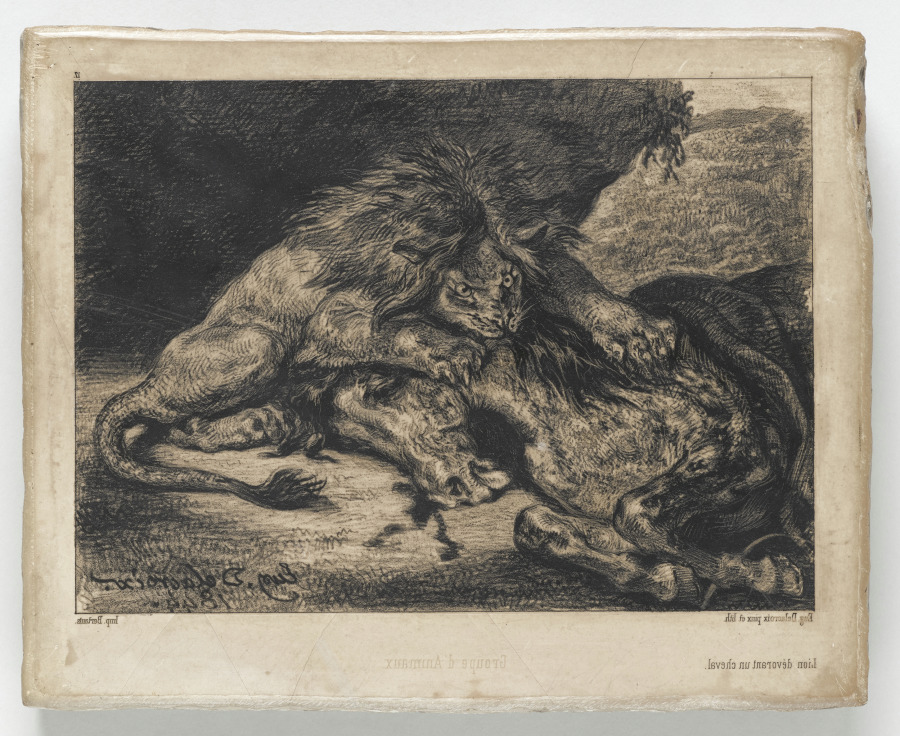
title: Lion Devouring a Horse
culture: France, 19th century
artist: Eugène Delacroix (French, 1798–1863)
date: 1844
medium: uncanceled lithographic stone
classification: Lithographic Stone